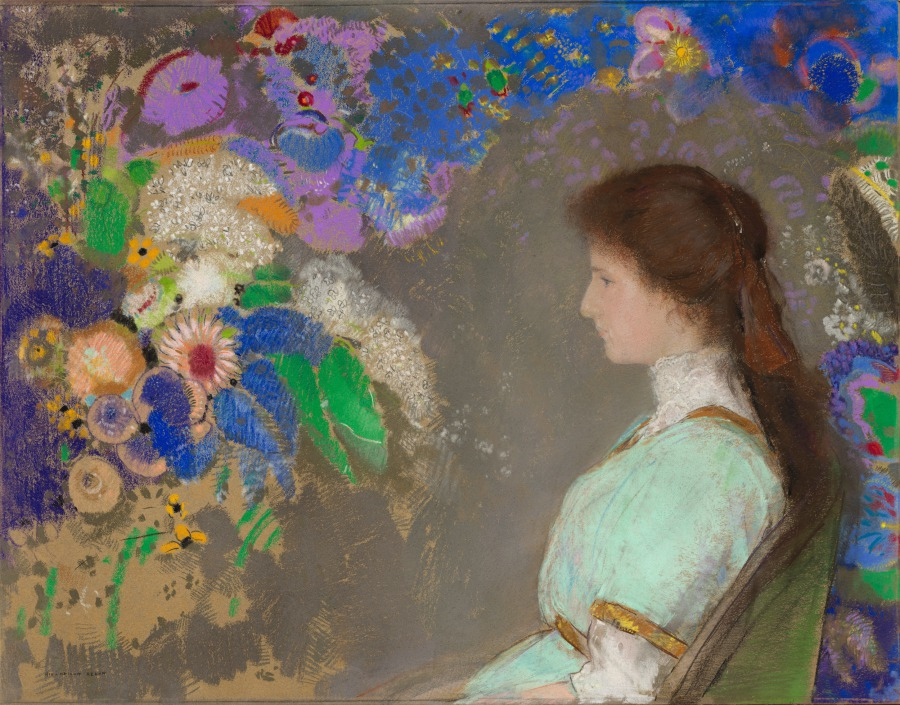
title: Violette Heymann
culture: France, early 20th Century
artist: Odilon Redon (French, 1840–1916)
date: 1910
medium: pastel on gray wove paper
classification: Drawing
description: Although he was known early in his career for works primarily in black and white, such as charcoal drawings and lithographs, Odilon Redon turned to more colorful media, including pastel, later on. In particular, he focused on commissioned pastel portraits of women with flowers, such as this one. Here, the young niece of the Parisian collector Marcel Kapferer appears alongside colorful blossoms as she looks forward, focused as if in the dreamlike state evoked by her surroundings.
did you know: This pastel was acquired by the Cleveland Museum of Art in the same year as several other works by Redon, leading arts writers to describe Cleveland as holding the most important works by the artist outside of Paris at the time.